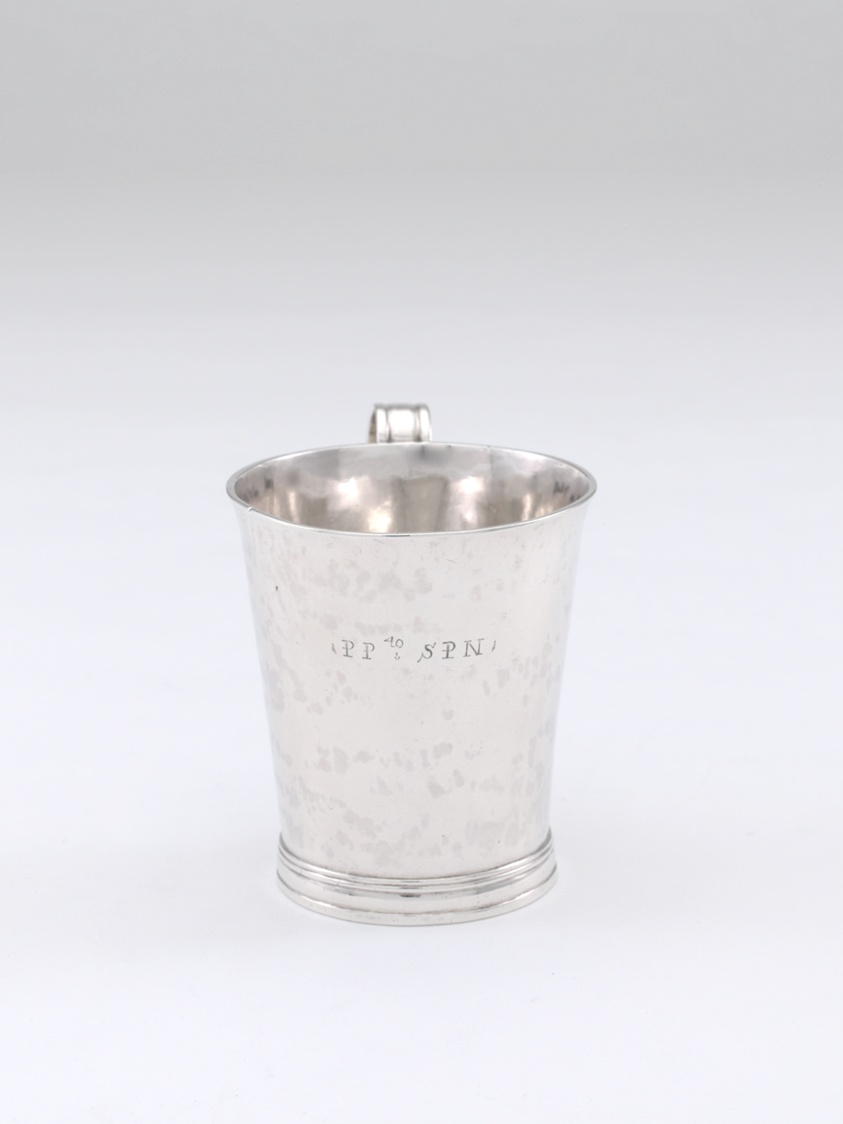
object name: Metalwork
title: Cup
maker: Joseph Loring (American, 1743–1815); Boston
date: 1764–75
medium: Silver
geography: Boston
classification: drinking vessel; silver; american decorative arts; american arts; decorative arts